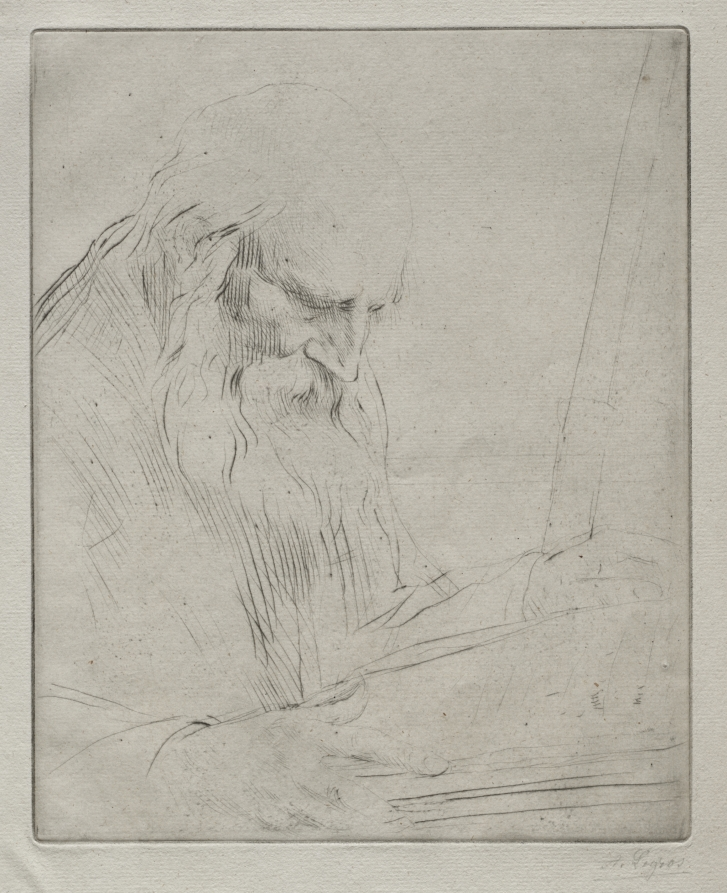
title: Study of a Man Reading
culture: France, 19th century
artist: Alphonse Legros (French, 1837–1911)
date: c. 1857–1911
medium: drypoint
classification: Print